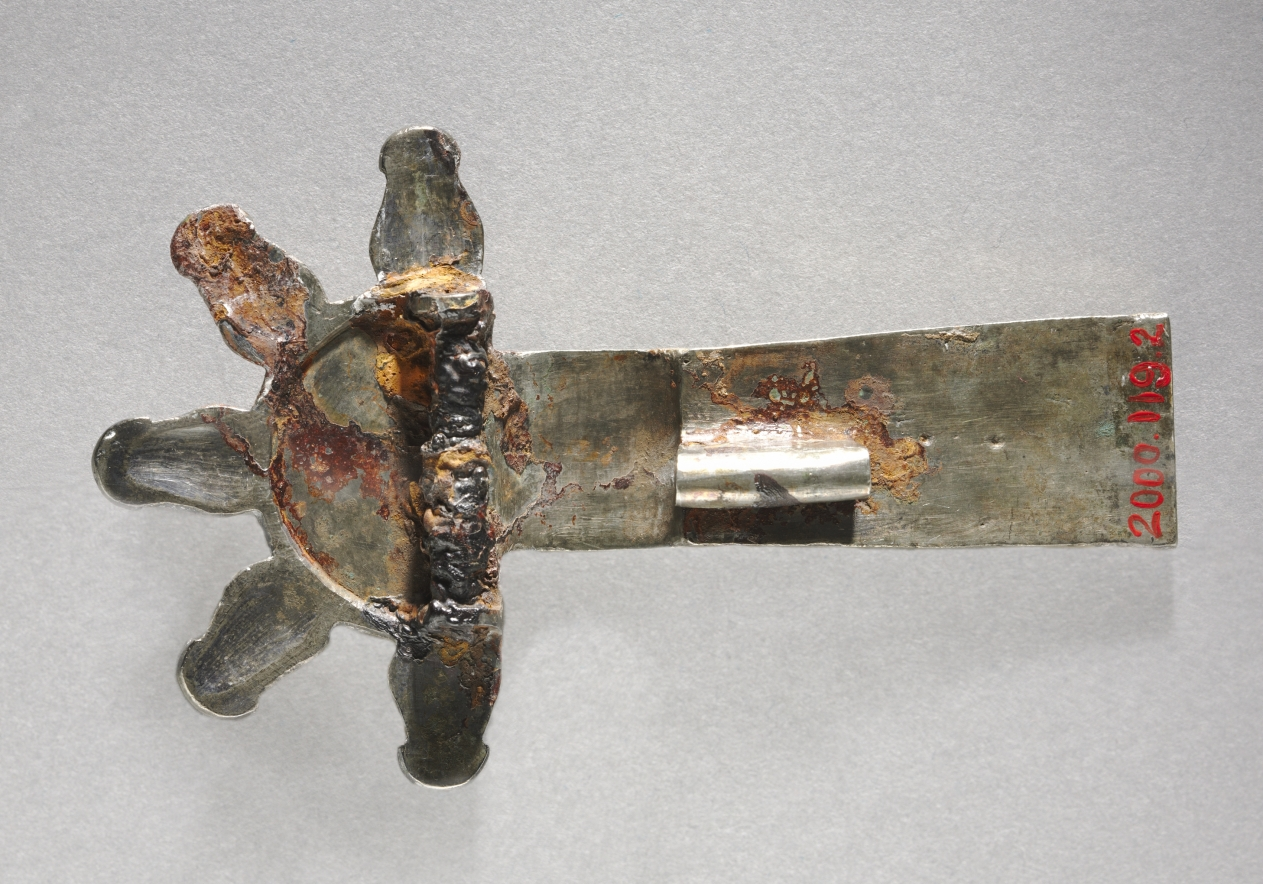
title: Fibulae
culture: Alemannic, Migration Period, 6th-7th century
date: 500s-600s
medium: cast silver, parcel-gilt, with niello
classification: Jewelry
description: A woman of high rank might have worn these twin fibulae on her shoulders, one fastening her inner garment on the right, the other her outer garment on the left. She might also have suspended them from her belt as decorative ornaments